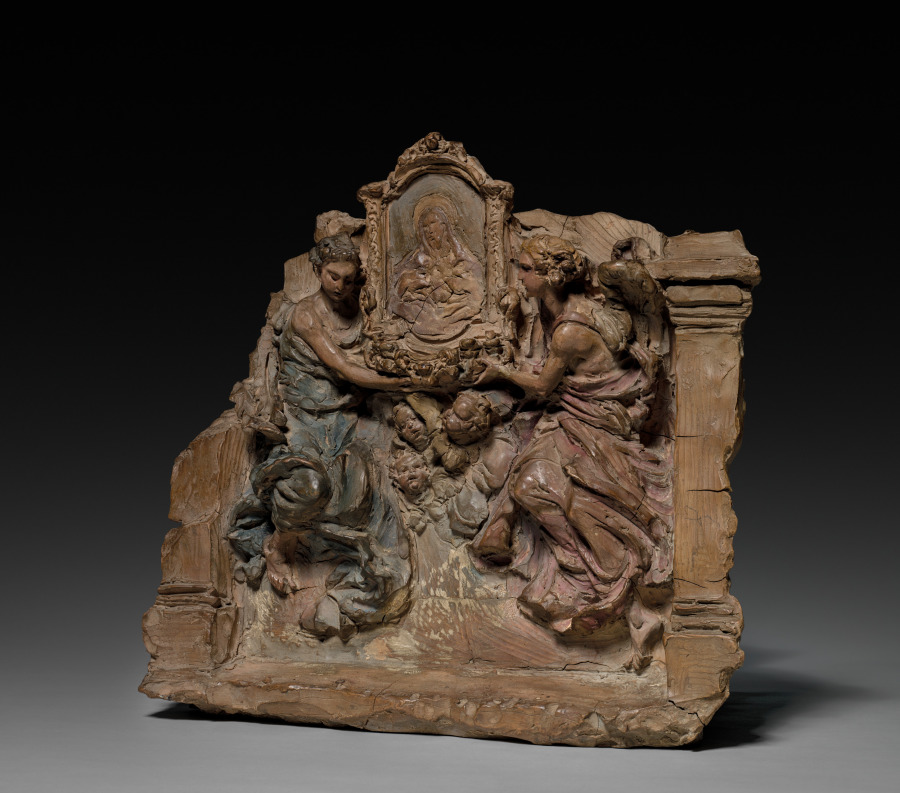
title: Two Angels and Cherubs Bearing an Icon of Christ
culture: Italy, Rome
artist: probably by Paolo Naldini (Italian, 1616–1691)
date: c. 1670–80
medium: terracotta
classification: Sculpture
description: This work is probably a study for a large altarpiece that would have combined several materials, including marble, stucco, and paint. The artist modeled his design in soft clay, which was then hardened by firing; subtle tints suggest the richness of the finished work. The idea of using sculptural figures to support a painted image within an altarpiece was influenced by the work of the Roman sculptor Gian Lorenzo Bernini (1598–1680), with whom Naldini is known to have worked.